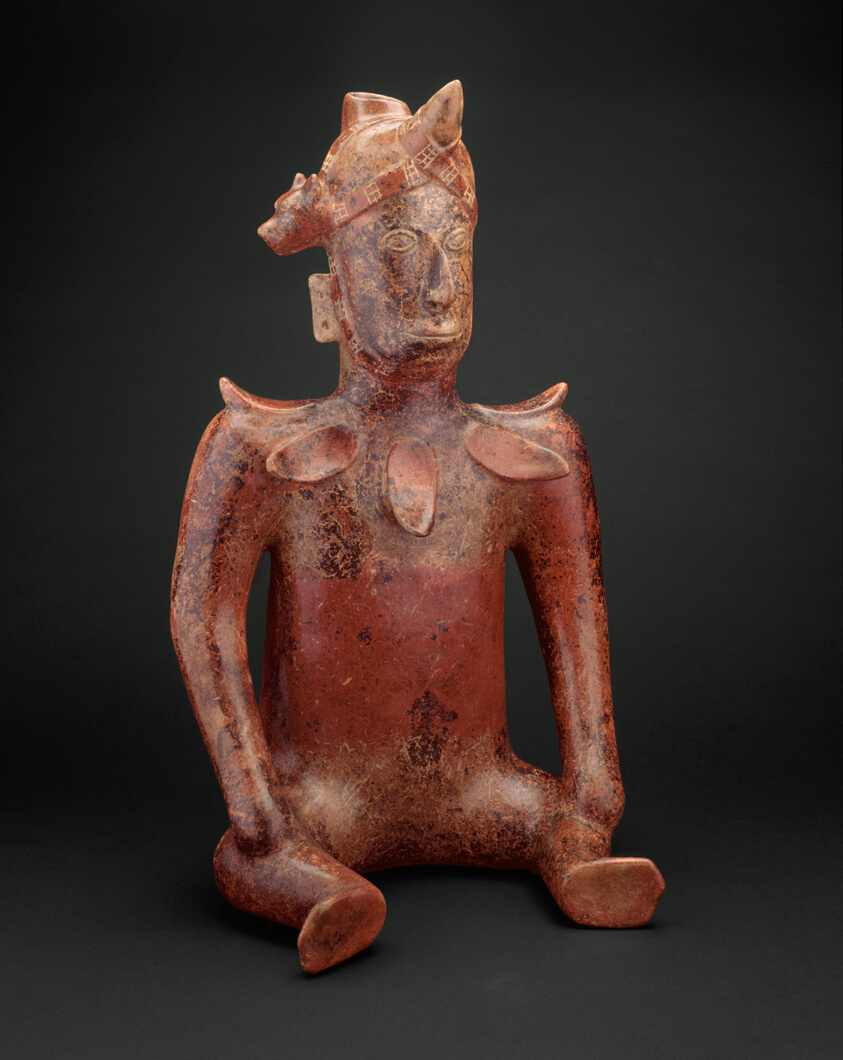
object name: Sculpture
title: Figure of a Seated Chieftain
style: colima, mesoamerican, Pre-Columbian, americas, west mexico, Arts of the Americas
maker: Colima (Colima, Mexico)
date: 100 BCE–250 CE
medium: Ceramic and pigment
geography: Colima state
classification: earthenware; art of the americas; ceramics; sculpture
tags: people, headdresses, rulers (people), rulership